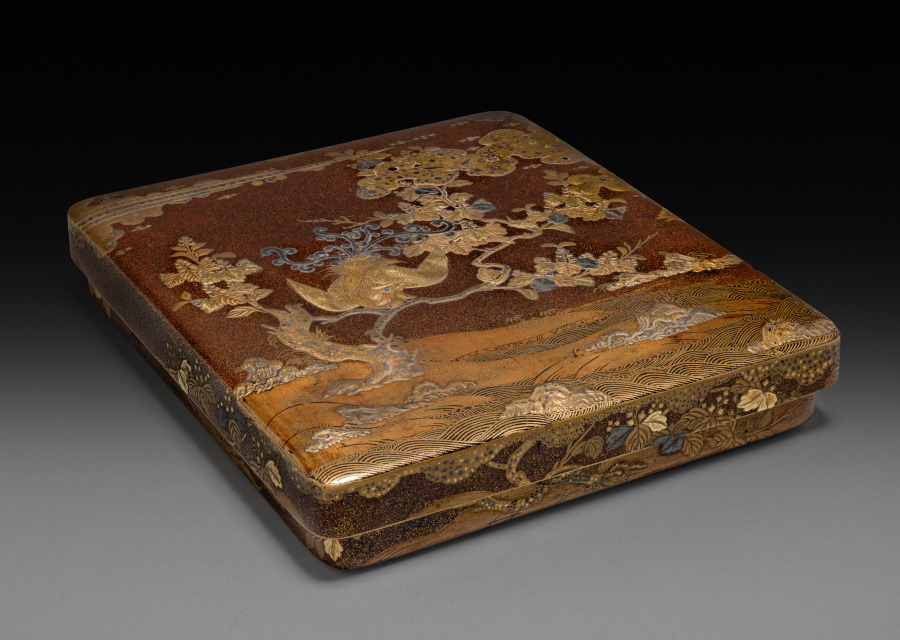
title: Writing Box (Suzuribako) with Phoenix in Paulownia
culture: Japan, Momoyama period (1573–1615)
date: late 1500s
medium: Lacquer on wood with sprinkled gold and silver powder (maki-e) and gold and silver foil application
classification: Lacquer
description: The only place the mythical phoenix will perch is in the paulownia tree. Along with the dragon, the bird is a symbol of imperial power in East Asia. This box––a container for an inkstone, brushes, and ink––is both functional and lavish, its dramatic effects achieved with a pear-skin ground decoration (nashiji) and sprinkled powder decoration in high relief (takamaki-e).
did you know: In contrast to the bright, celebratory motifs on the exterior, the interior of the box invites a more reflective mood with its autumn moonlit sky over chrysanthemums.